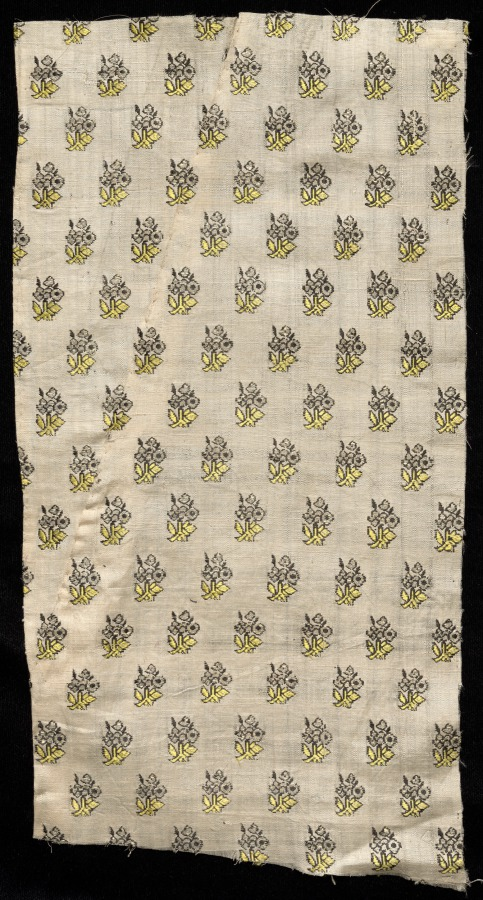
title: Fragment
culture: India, 19th century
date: 1800s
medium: brocade; silk and metal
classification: Textile